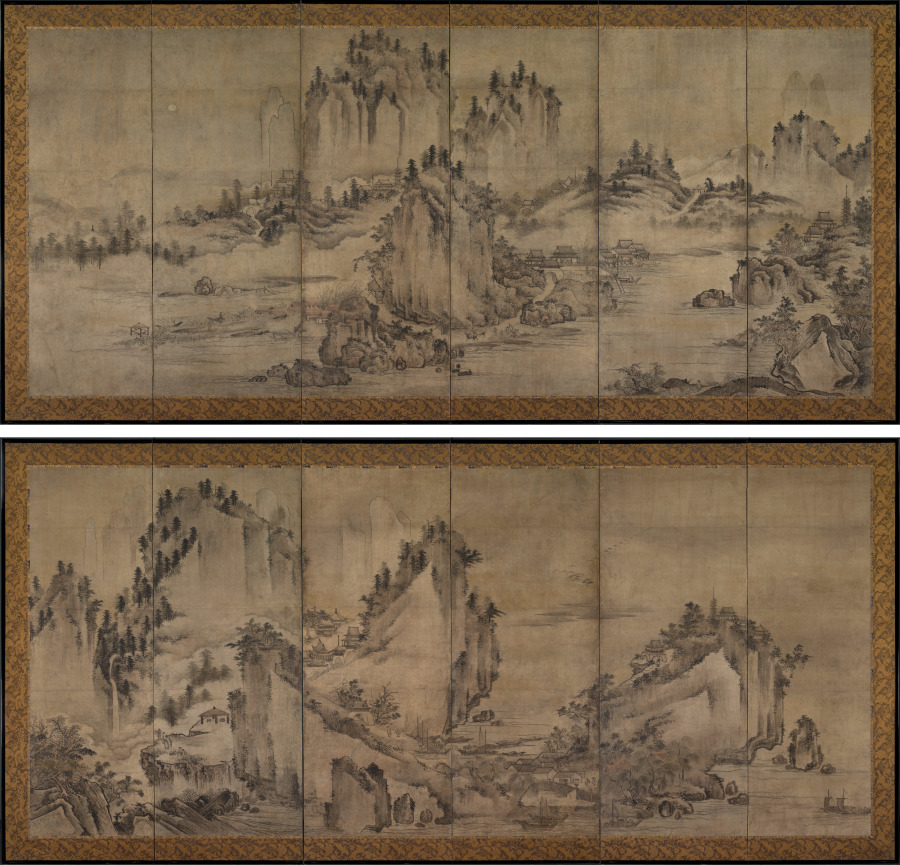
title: Landscape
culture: Japan, Muromachi period (1392–1573)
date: 1550–99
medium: Pair of six-panel folding screens; ink and color on paper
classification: Painting